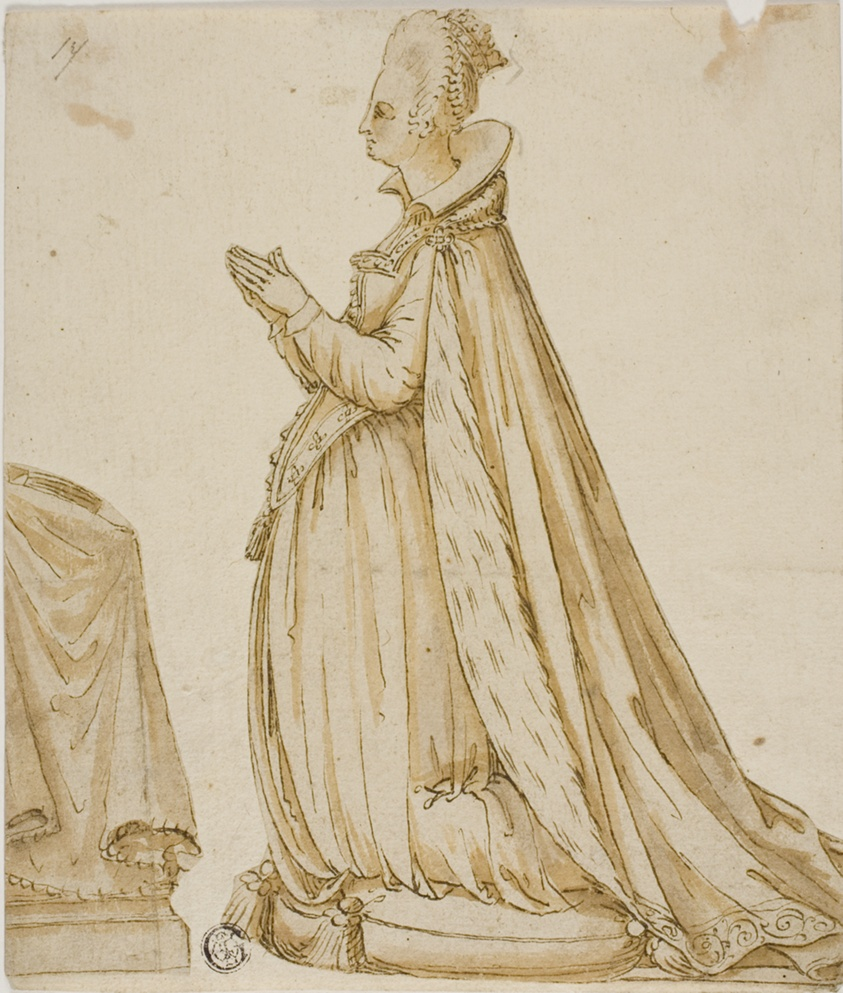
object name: Drawing and Watercolor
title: Lady Before a Prie-Dieu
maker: Possibly after Leone Leoni; Italian, 1509-1590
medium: Pen and brown ink, with brush and yellowish-brown wash, on cream laid paper cut-outs, laid down on cream laid paper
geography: France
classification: pen and ink drawings; drawings (visual works); prints and drawing